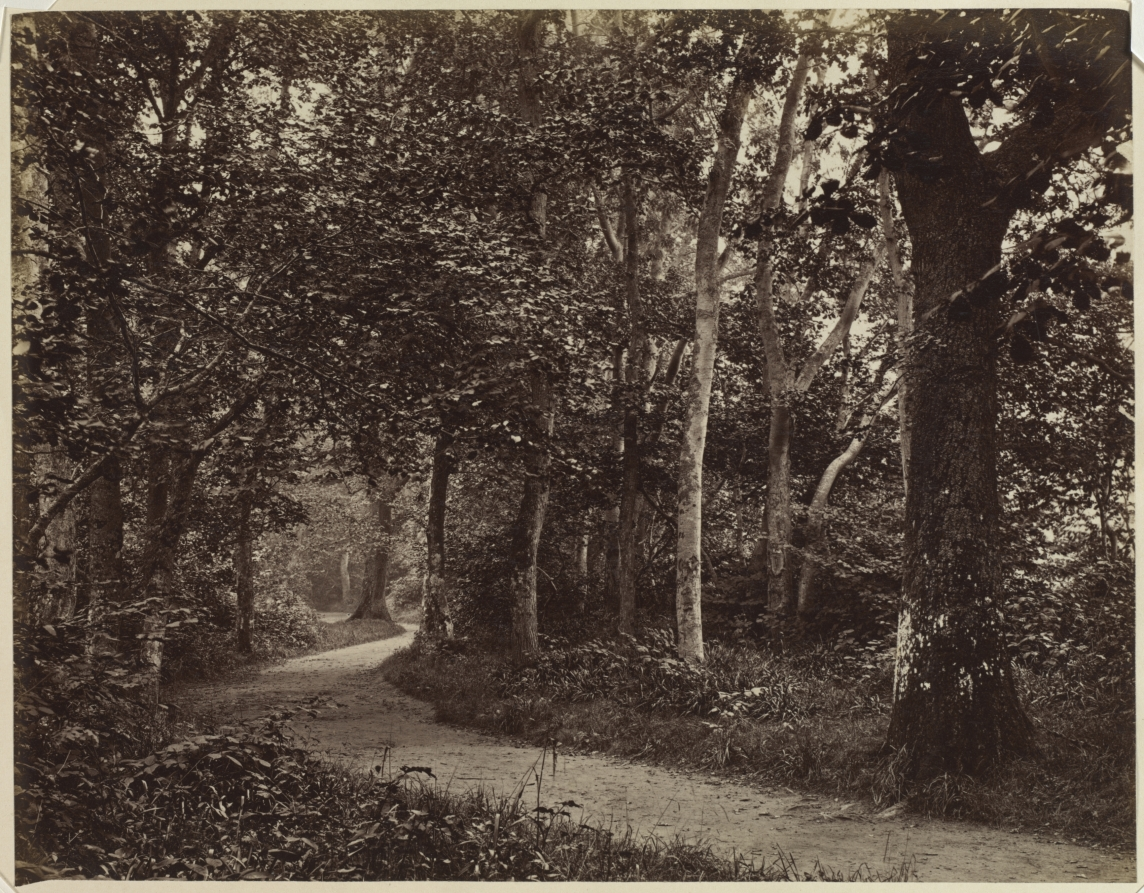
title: Untitled (Landscape)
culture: France(?)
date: early 1860s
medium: albumen print from wet collodion negative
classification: Photograph